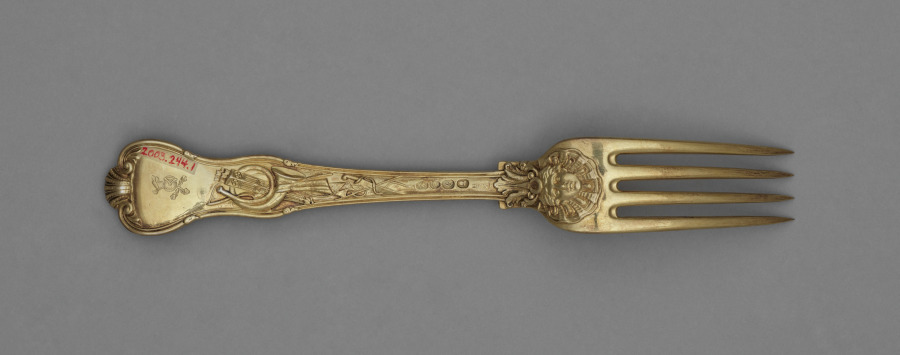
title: Dessert Fork with Hunt Scenes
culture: England, London, 19th century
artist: Paul Storr (British, 1771–1844)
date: c. 1822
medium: gilt silver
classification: Silver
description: Paul Storr was perhaps the most famous and successful English silversmith working in the early 19th century. This fork and spoon were originally part of a larger set. The exceptionally high quality of the metalworking and gilding of these pieces is typical of Storr's work.